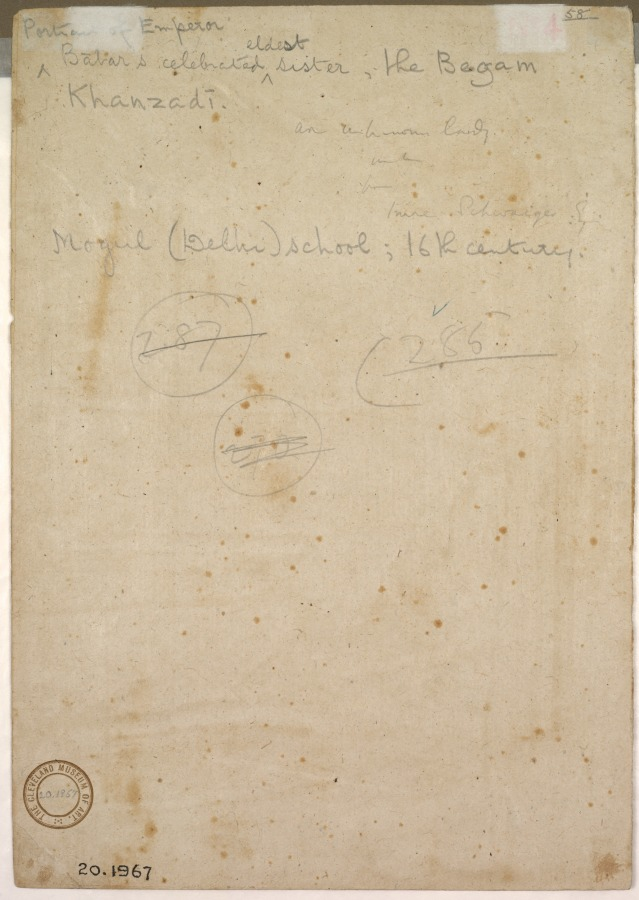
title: Oval portrait of a woman in a Chaghtai hat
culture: India, Mughal, 18th century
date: c. 1740–50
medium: Gum tempera and gold on paper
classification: Painting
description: The tall, flat-topped hat is an element of the native dress of the Mughals from eastern Uzbekistan. Of mixed Turkic and Mongol ethnicities, they spoke a Turkic language known as Chaghatai. Chaghatai refers to the name of the son of the Mongol Chingiz (Genghis) Khan, who ruled this area of Central Asia from 1246 to 1282. This woman’s hat has been studded with jewels and strings of pearls. The portrait jewel format that was once reserved for the emperor has now been expanded to include ladies of the court. The woman holds a jade wine cup and wears a draped upper garment with a woven or embroidered border similar to the fragment on display at the left.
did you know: She holds a delicate jade cup of the type for which the Mughals were famous.